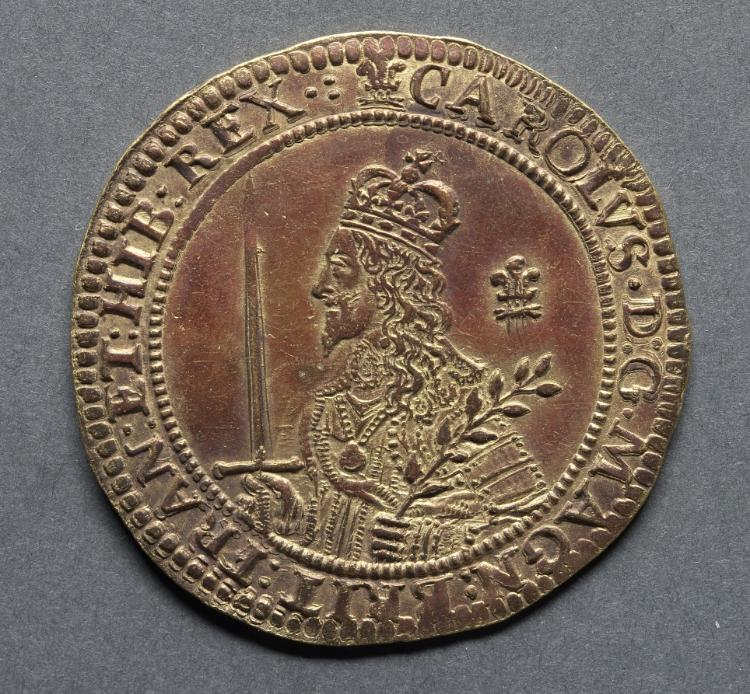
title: Triple Unite or Three Pound Piece: Charles I (obverse)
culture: England, Charles I, 1625-1649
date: 1643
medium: gold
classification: Coins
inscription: CAROLUS DG MAG BRIT FRAN ET HIB REX